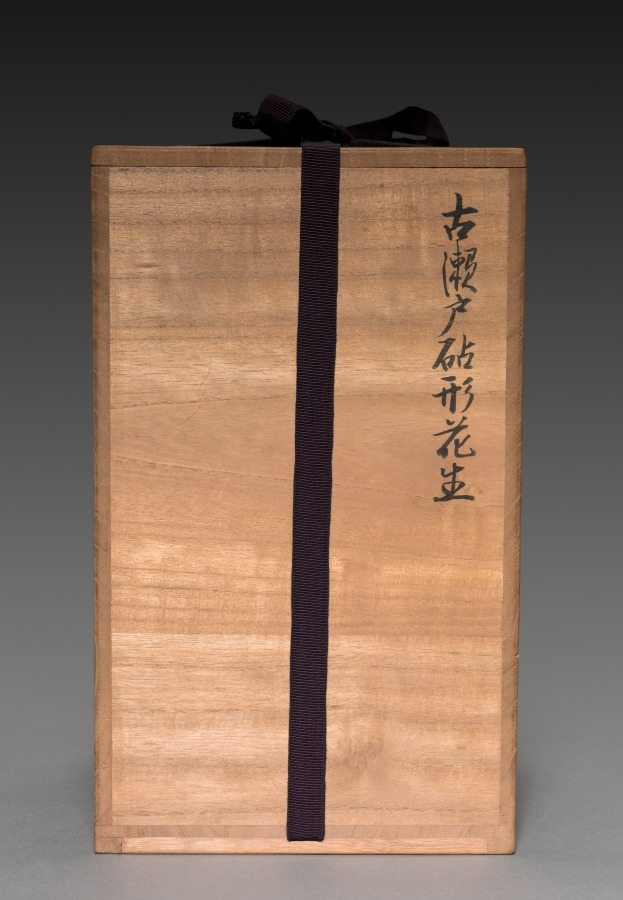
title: Bottle Vase: Seto Ware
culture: Japan, Momoyama period (1573-1615) to Edo period (1615-1858)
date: 1600–1650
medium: slip glazed stoneware (Mino or Seto ware)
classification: Ceramic